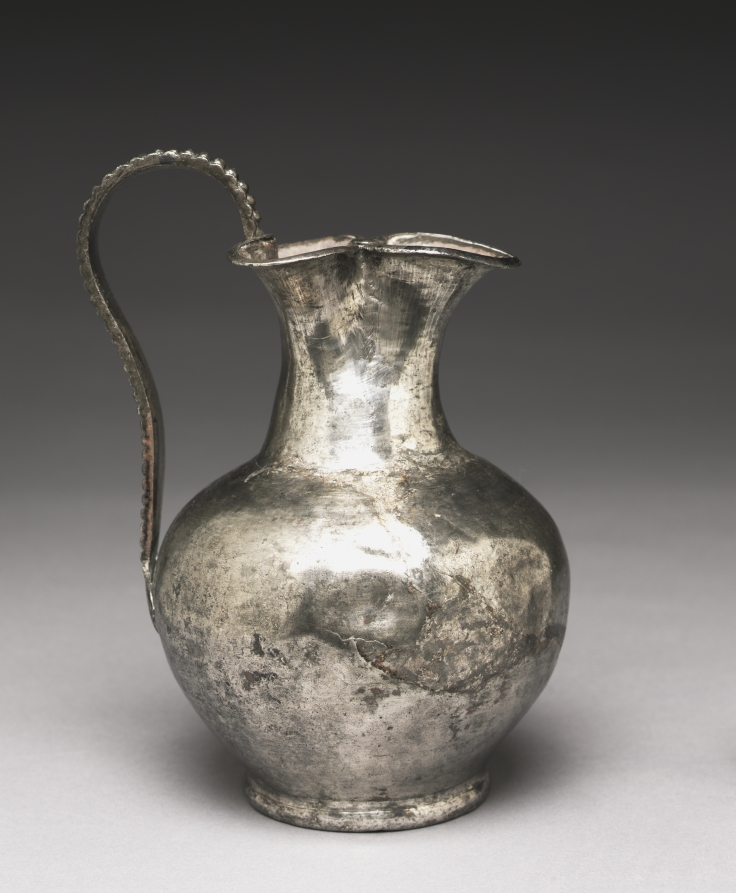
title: Ewer with a Trefoil (Three-Part) Spout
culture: Byzantium, Syria(?), Byzantine period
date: 300–600 CE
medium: silver with niello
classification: Metalwork